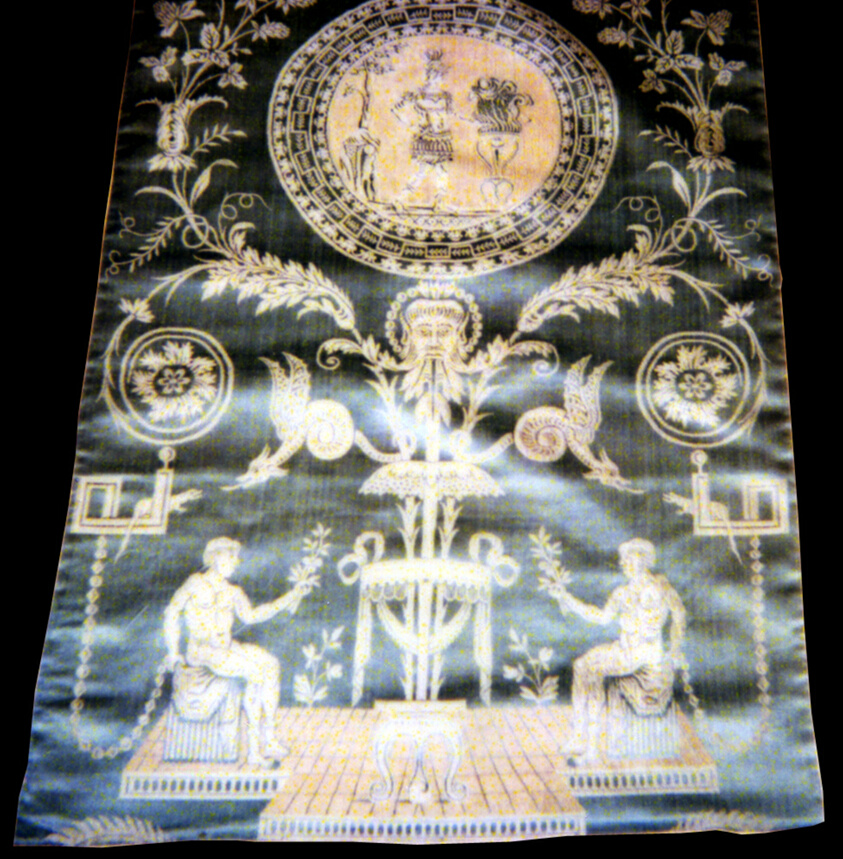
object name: Textile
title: Panel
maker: Europe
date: Late 18th century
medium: Silk, satin weave with plain interlacings of secondary binding warps, brocading wefts and self-patterning ground wefts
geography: Europe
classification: textile; weaving